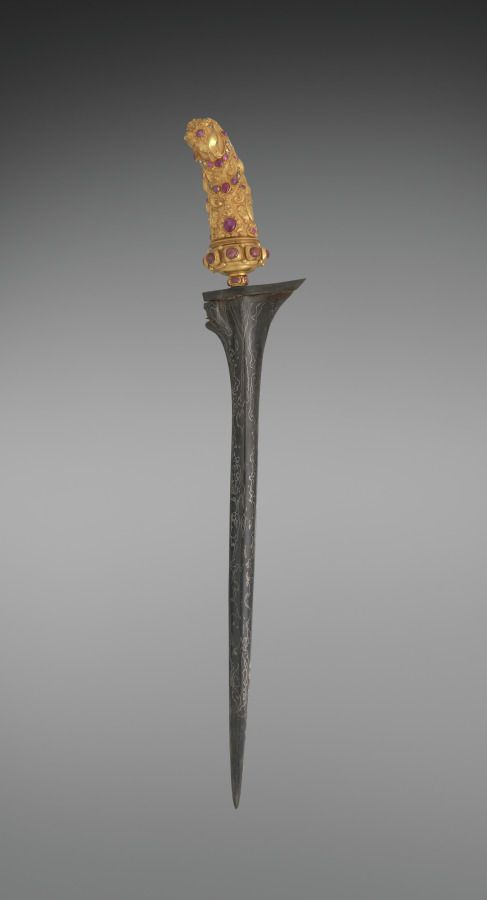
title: Kris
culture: Indonesia, Bali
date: 1800s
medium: metal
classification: Arms and Armor